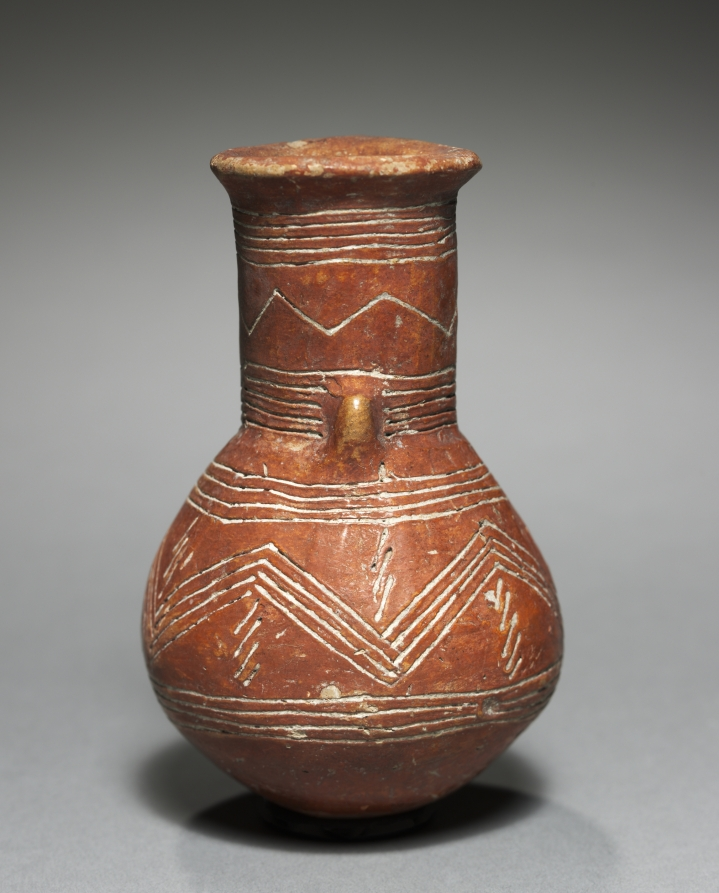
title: Jug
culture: Cyprus, early Cypriot III-middle Cypriot II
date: 2000–1800 BCE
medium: red ware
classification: Ceramic